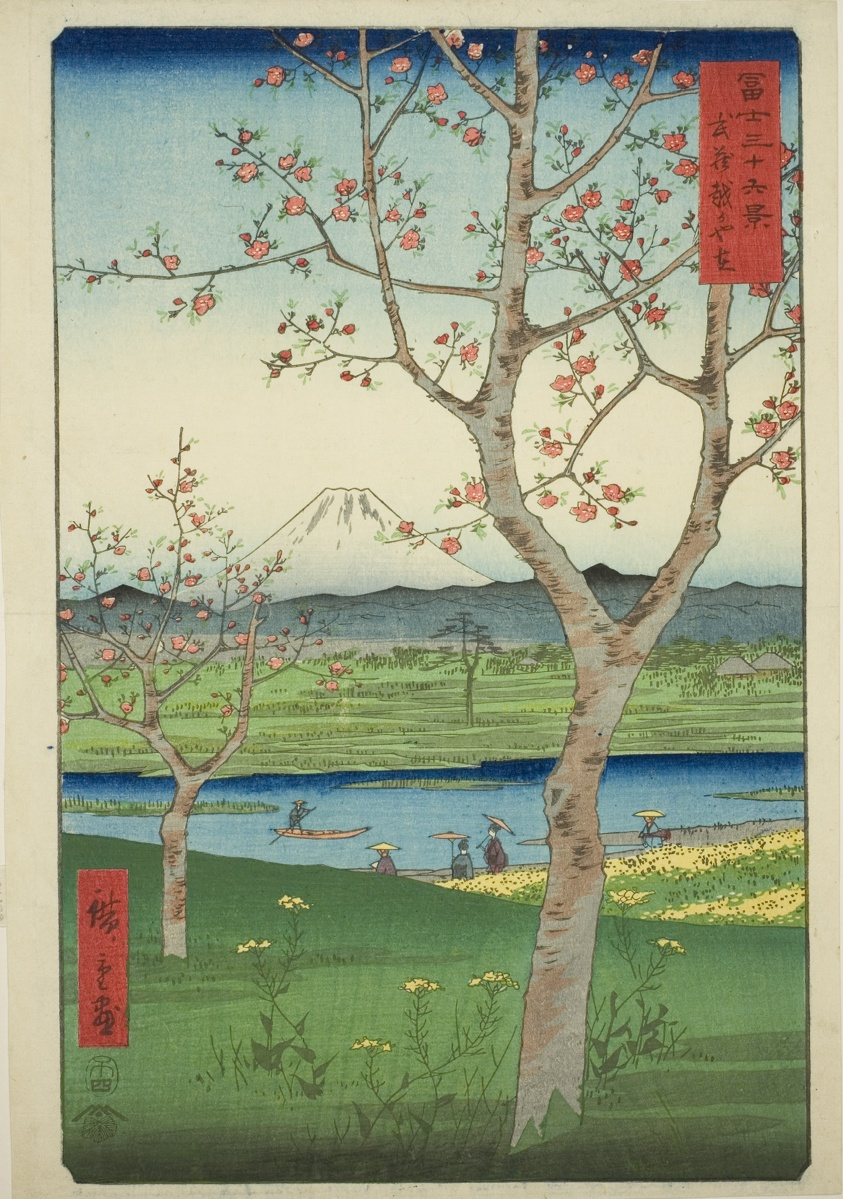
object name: Print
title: The Outskirts of Koshigaya in Musashi Province (Musashi Koshigaya zai), from the series "Thirty-six Views of Mount Fuji (Fuji sanjurokkei)"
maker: Utagawa Hiroshige 歌川 広重; Japanese, 1797-1858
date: 1858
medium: Color woodblock print; oban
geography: Japan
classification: woodblock print; print; asian art